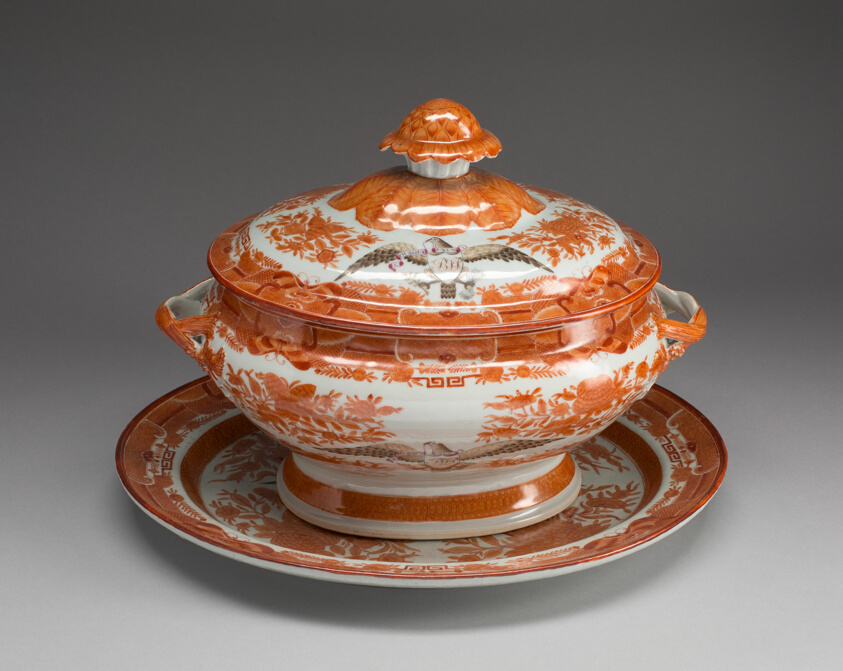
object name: Ceramics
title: Covered Tureen and Platter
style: Export porcelain, chinese export, 19th century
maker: Artist unknown (Chinese, made for the American market); China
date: 1800–15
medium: Porcelain, glaze, enamels, and gilding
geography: China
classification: tableware; art of the americas; ceramics; porcelain; decorative arts; American market; chinese export porcelain; pottery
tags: dining, eagle with shield